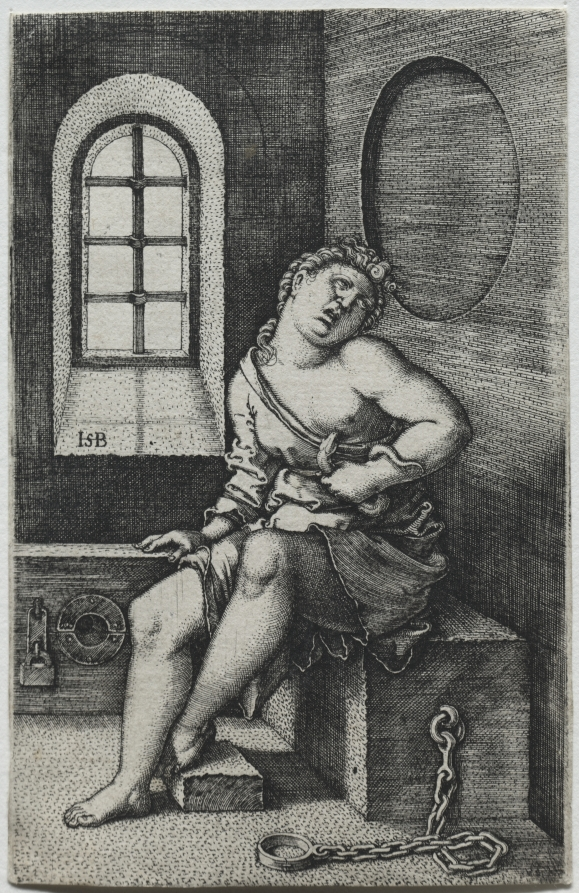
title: Cleopatra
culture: Germany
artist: Hans Sebald Beham (German, 1500–1550)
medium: engraving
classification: Print